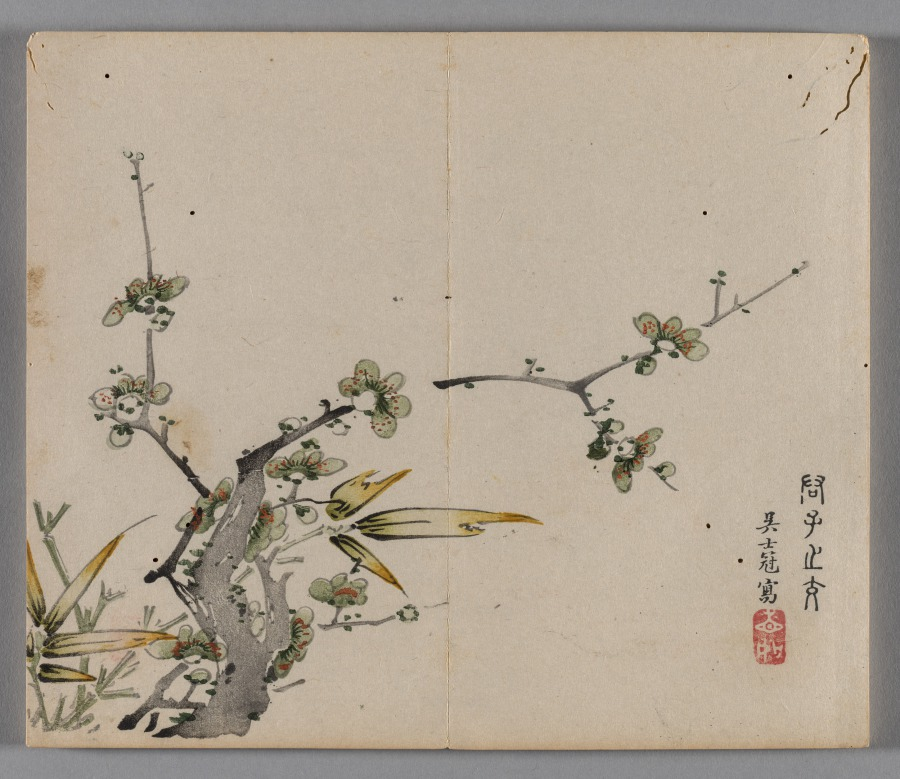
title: Ten Bamboo Studio Painting and Calligraphy Handbook (Shizhuzhai shuhua pu): Plum Blossoms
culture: China, Qing dynasty (1644-1911)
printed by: Hu Zhengyan (Chinese, c. 1584–1674)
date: 1633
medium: Woodblock-printed book; ink and colors on paper; first edition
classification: Print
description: Color printing reached a level of perfection in the early 1600s, as seen in this Ten Bamboo Studio Collection of Calligraphy and Painting and the Mustard Seed Garden Manual of Painting (printed 1679 and 1701). The painterly quality, precision in registering (aligning) the woodblocks, and harmonious colors made them the most successful color print editions in Chinese history. Both editions were printed and compiled in Nanjing, spread nationwide, and had a great impact on the arts in Japan and Korea.